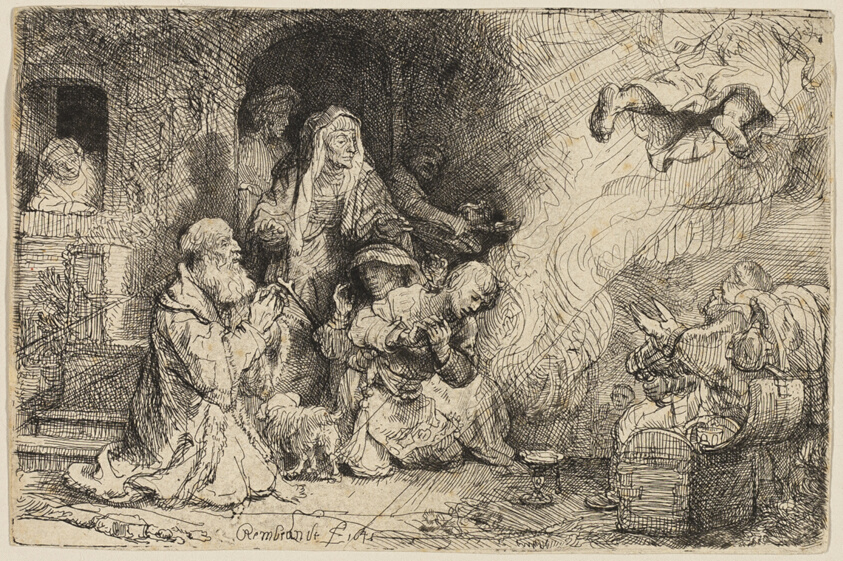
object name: Print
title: The Angel Departing from the Family of Tobias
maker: Rembrandt van Rijn (Dutch, 1606-1669)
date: 1641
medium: Etching and drypoint on ivory laid paper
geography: Holland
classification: etching; print; prints and drawing; paper; drypoint